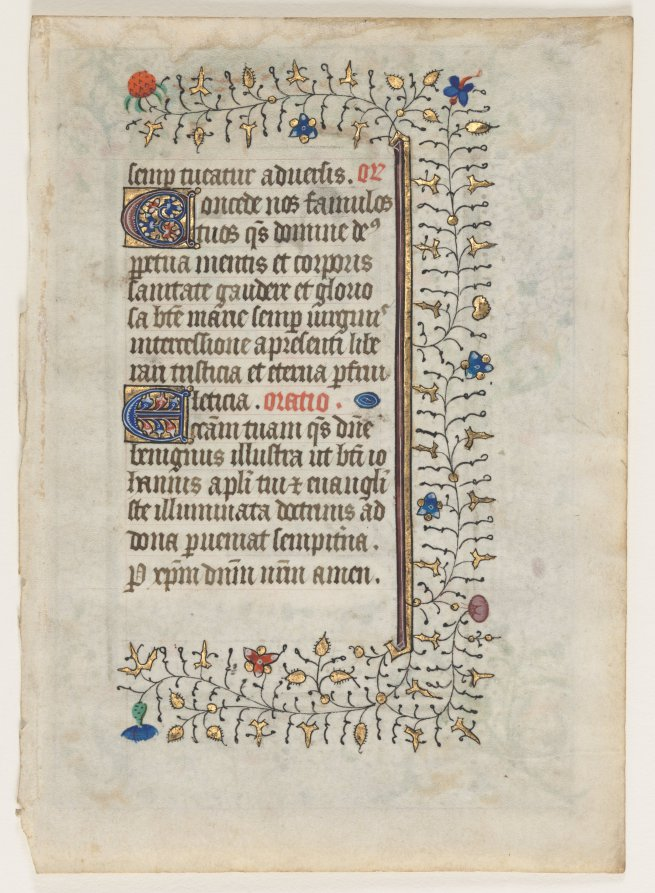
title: Leaf from a Book of Hours: Adoration of the Magi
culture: France, Paris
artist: Master of Thomas Hoo (French)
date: c. 1440–50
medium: ink, tempera and gold on vellum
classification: Manuscript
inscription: Deus in adiutorium meum intende...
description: The Adoration of the Magi, an important image in Christian tradition that recalls the visit of three kings to see the newly born Jesus, is depicted here. The artist, known as the Master of Thomas Hoo, gets his name from a book of hours made for Lord Thomas Hoo, chancellor of Normandy and of France. His work is characterized by a rich palette, lush draperies, and finely delineated landscapes. The artist thickly applied gold leaf to the crowns and halos and used liquid gold to highlight the hems of his figures’ garments.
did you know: This page begins the prayers to be said at the hour of sext, or the sixth hour of the day (around noon).